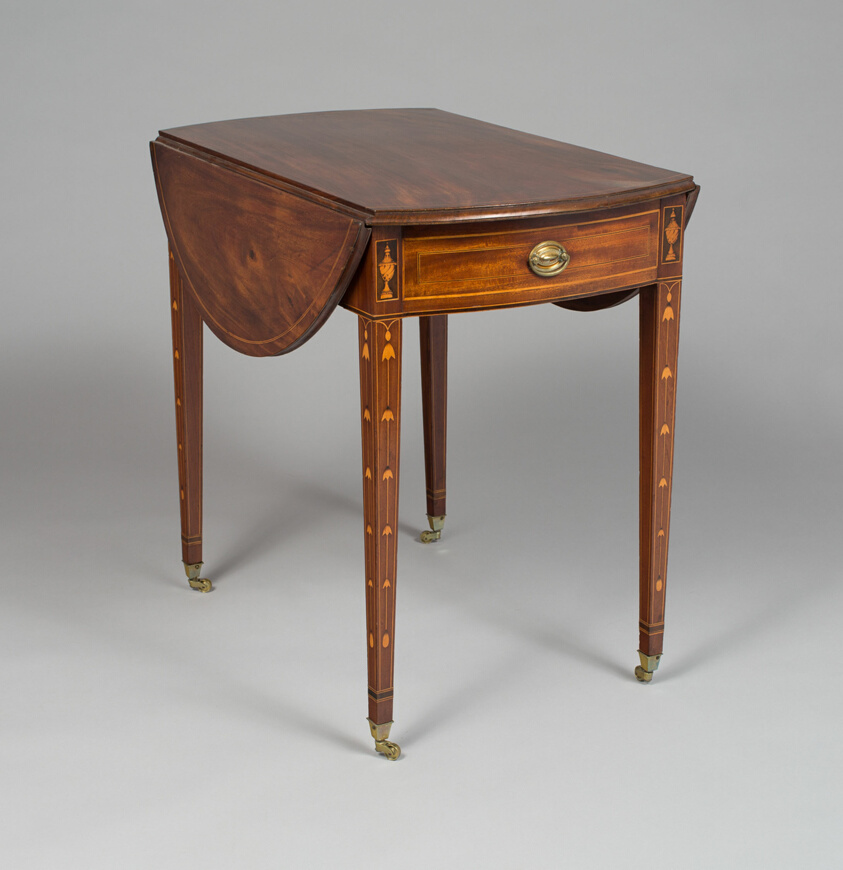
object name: Furniture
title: Pembroke Table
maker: Artist unknown (American, 18th–19th century); New York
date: 1790–1805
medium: Mahogany and eastern white pine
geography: New York City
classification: table; furniture; american decorative arts; american arts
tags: furniture